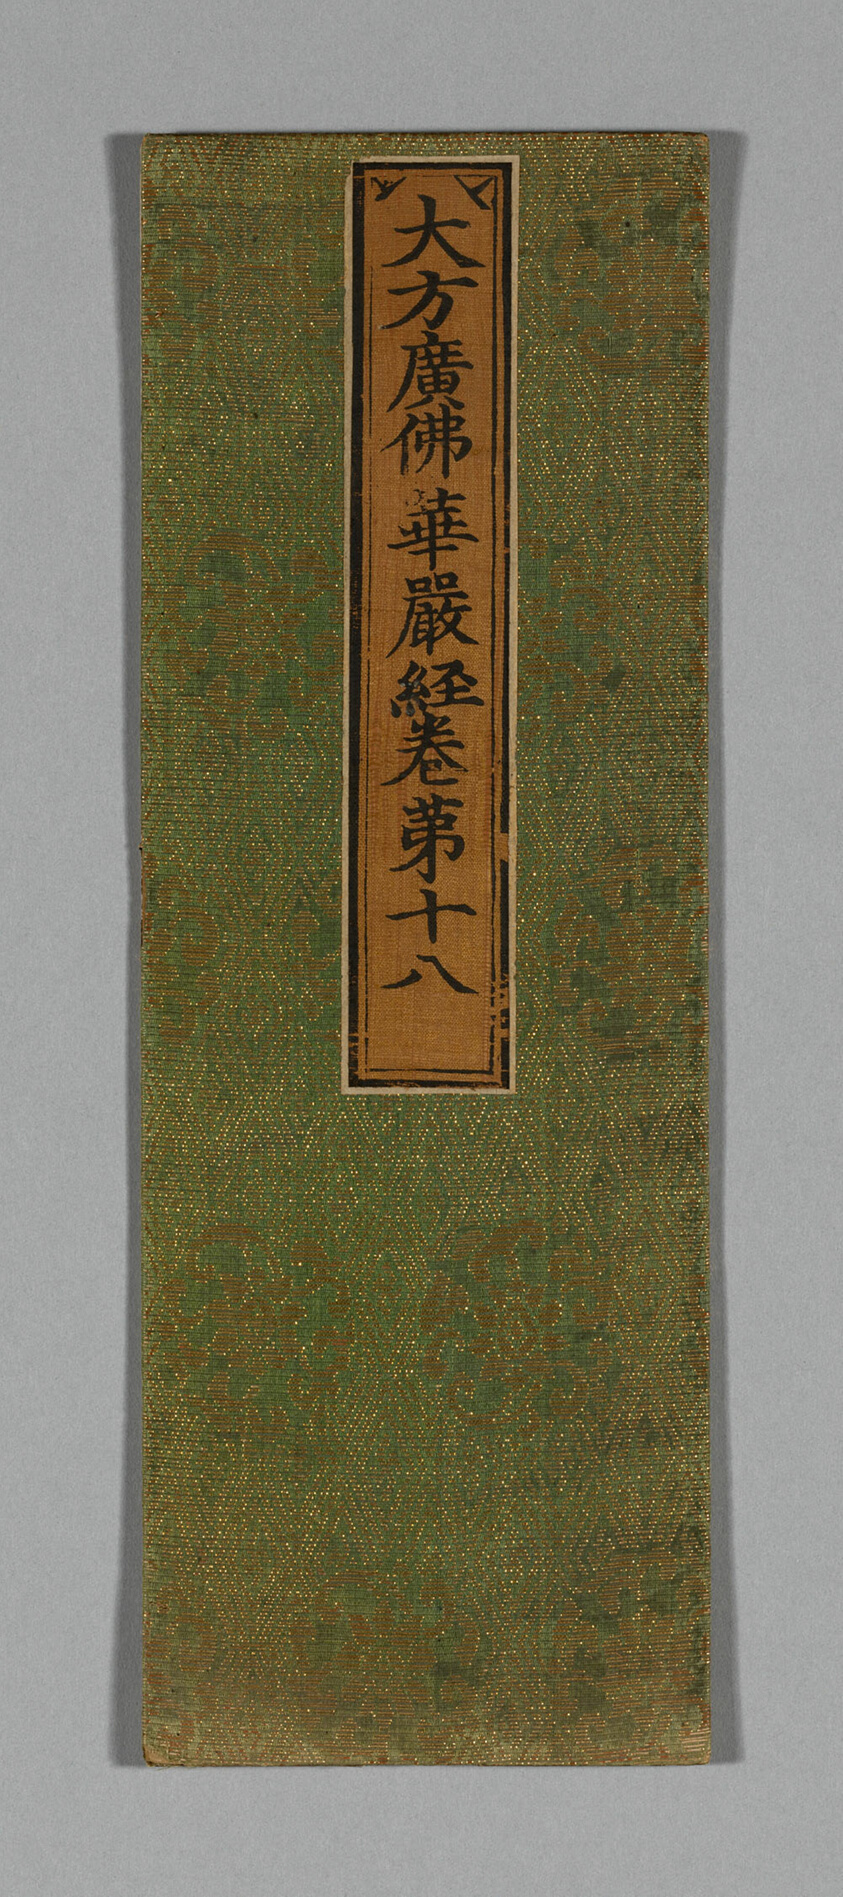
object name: Textile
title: Sutra Cover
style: ming, Chinese (culture or style), East Asian, asian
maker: China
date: Ming dynasty (1368–1644), c. 1590's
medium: Silk and gold-leaf-over-lacquered-paper strip, warp-float faced 3:1 broken twill weave with supplementary wefts bound in plain interlacings; label: silk, plain weave; painted with ink; over paper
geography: China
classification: textile; weaving